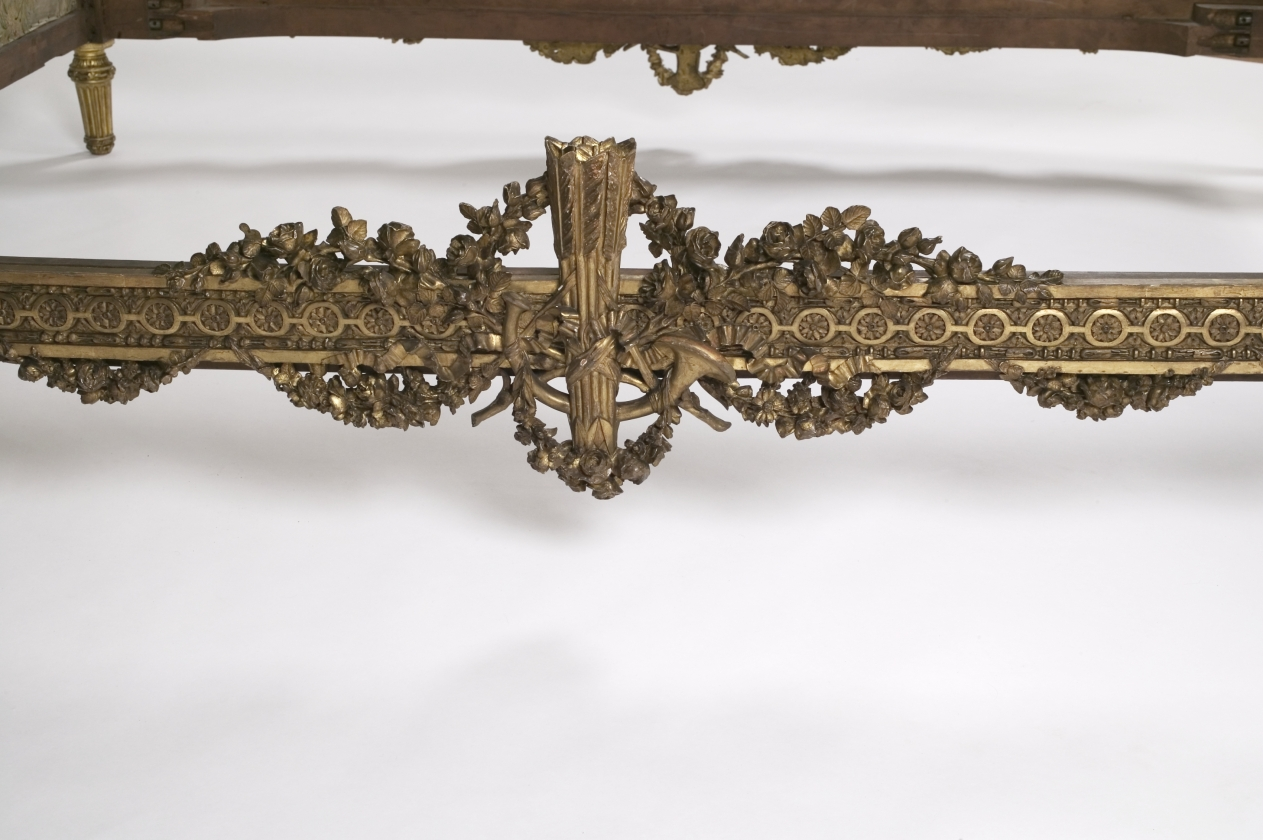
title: Bed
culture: France, 18th century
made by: attributed to Georges Jacob (French, 1739–1814)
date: 1700s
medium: gilded wood and embroidered satin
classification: Furniture and woodwork